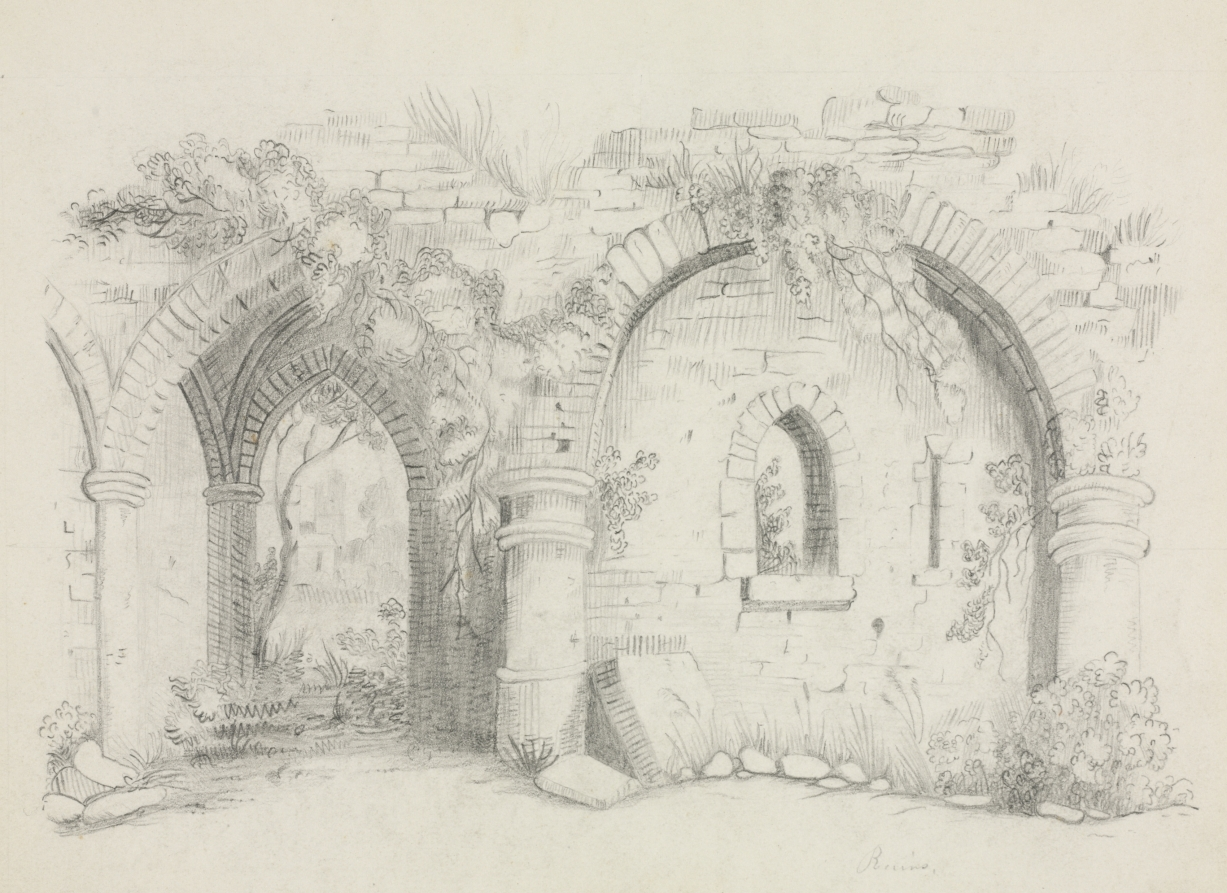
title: Ruins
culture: America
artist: Mary Altha Nims (American, 1817–1907)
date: c. 1840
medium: pencil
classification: Drawing